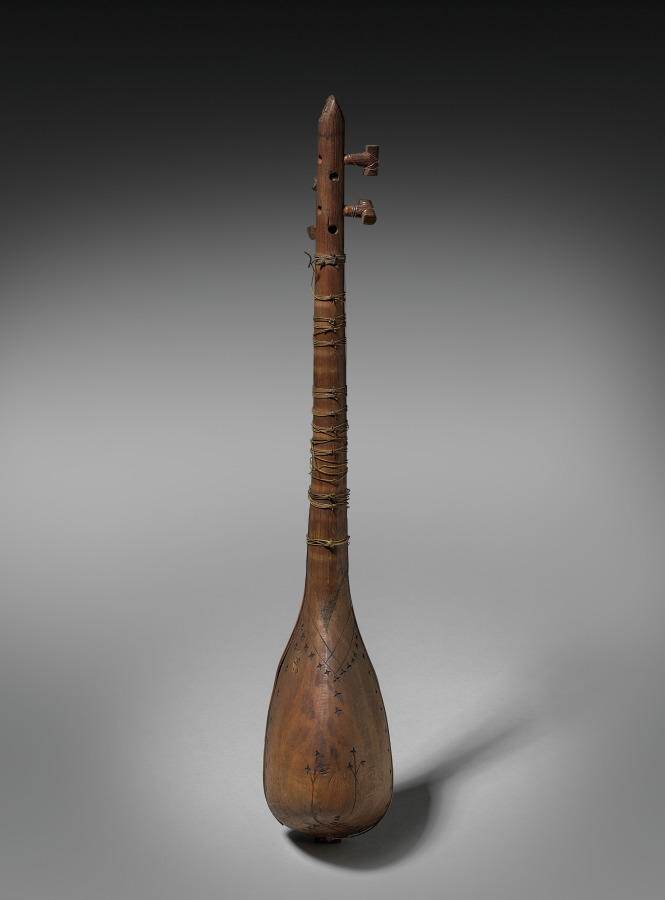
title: Tanbūr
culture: Syria or Turkey, Ottoman period (1299–1922)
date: late 1800s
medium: Wood, bone, mother-of-pearl, and wire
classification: Musical Instrument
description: This long-necked lute collected in Ottoman Syria possesses traits that are Syrian, Turkish, and Iranian and provides an example of the musical interaction between cultures. It is an ancient instrument and resembles lutes used in Pharaonic Egypt and Mesopotamia. In its many forms, the tanbūr was a common instrument throughout the Islamic world. It is often used as a solo instrument in both sacred and secular contexts. Burn marks decorate the pear-shaped body along with inlaid dots of mother-of-pearl, which may also have helped with navigation of the fret board by the player.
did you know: The two pairs of wire strings would be played with a quill plectrum.